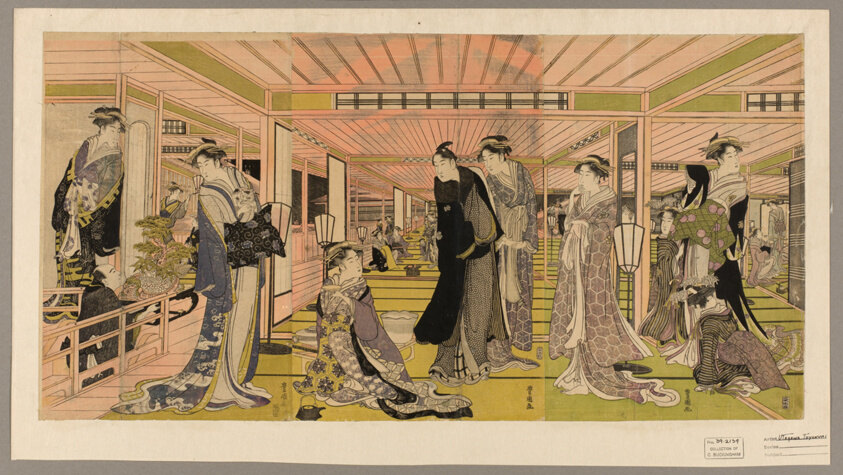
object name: Print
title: The parlor of a brothel in the pleasure quarters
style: Japanese (culture or style)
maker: Utagawa Toyokuni I 初代 歌川 豊国; Japanese, 1769–1825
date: c. 1789/1801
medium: Color woodblock print; oban triptych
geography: Japan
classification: woodblock print; print; asian art